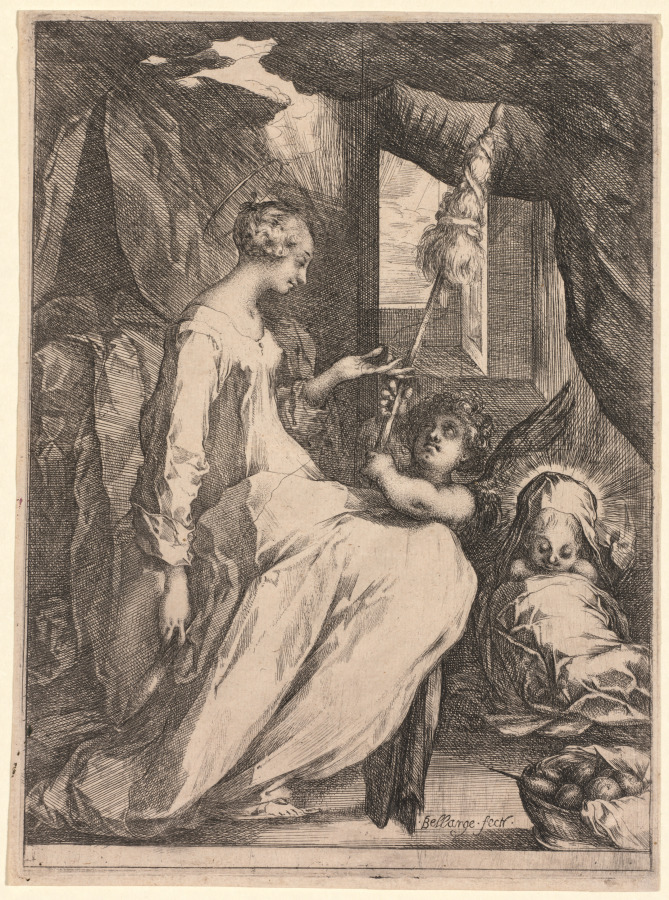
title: The Virgin and Child with Distaff and an Angel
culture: France, 17th century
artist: Jacques Bellange (French, c. 1575–1616)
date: c. 1611–13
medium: etching and engraving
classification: Print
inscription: lower right, in plate: · Bellange · fecit · ; VERSO, lower left, in graphite: 37V D139 ; lower right, in graphite: J. Bellange RD. 3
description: Bellange produced only 48 etchings between 1611 and 1616, yet his brilliant artistic imagination and technical mastery place him among the greatest European printmakers of the 17th century. Although based on traditional Christian imagery, Bellange’s etchings are filled with an unusual psychological drama and a penetrating spirituality. Elongated, sensual figures engage in provocative scenes that might seem extreme or even bizarre but are characteristic of Mannerism, an international artistic style at the time. Here, the Virgin Mary spins thread while the Christ child sleeps. The basket of wool and the distaff holding the wool as it is spun both relate to the legend that describes the Virgin’s upbringing at the Temple of Jerusalem, where she spun wool and wove vestments for the priests.